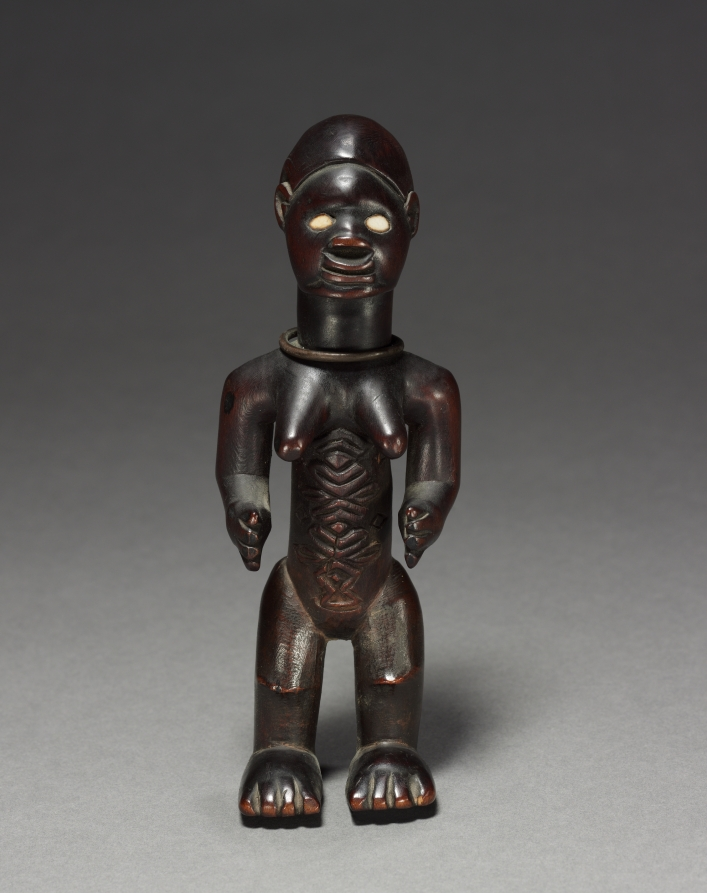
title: Female Figurine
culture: Africa, Central Africa, Republic of the Congo, Beembe-style maker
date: late 1800s-early 1900s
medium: Wood, possibly ceramic, and copper alloy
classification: Sculpture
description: Beembe figurines generally have greatly detailed anatomical and decorative features. The scarification among Beembe men and women communicated their ideas about local beauty and ethnic belonging. These figures are charged with an ancestor’s spirit through a mixture of resin and human-derived ingredients—taken from the corpse of the person they possibly portray—into a small cavity near the rectum.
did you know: The carvings in the figure’s abdomen reflect the custom of body scarification among the Beembe people.